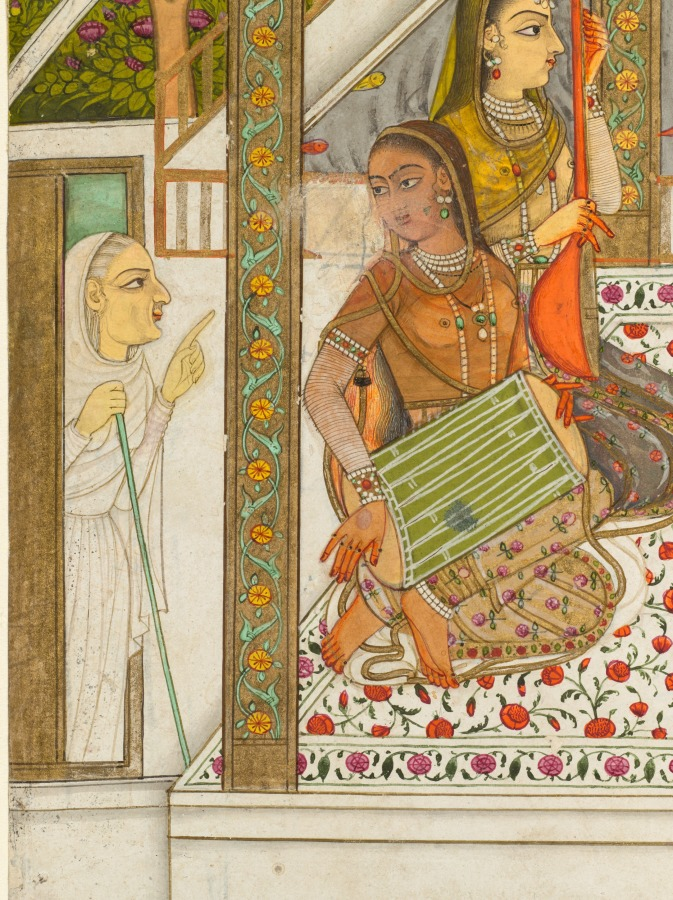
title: A princess with attendants on a terrace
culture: India, Hyderabad, Deccan, 18th century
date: c. 1720–1730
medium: Gum tempera and gold on paper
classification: Painting